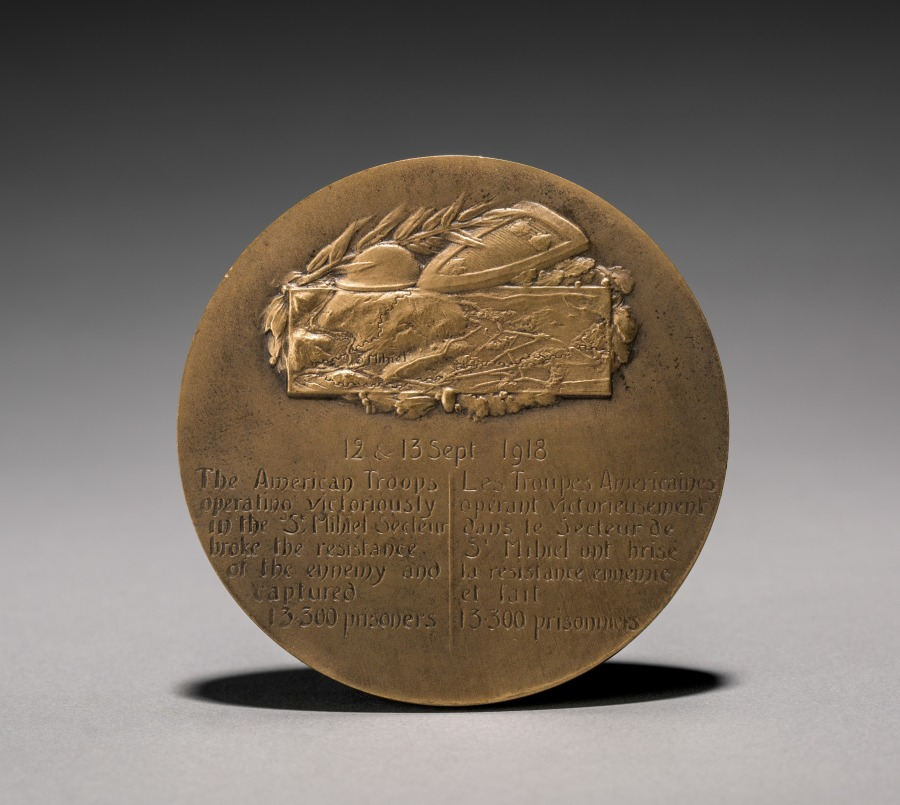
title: Medal (reverse)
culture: France, 20th century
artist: Edouard Fraisse (French, 1880–1945)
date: 1900s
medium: bronze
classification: Metalwork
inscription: "12 - 13 Sept. 1918"; in French and English: "The American Troops operating victoriously in the St. Mihiel secteur broke the resistance of the enemy and captured 13,300 prisoners."